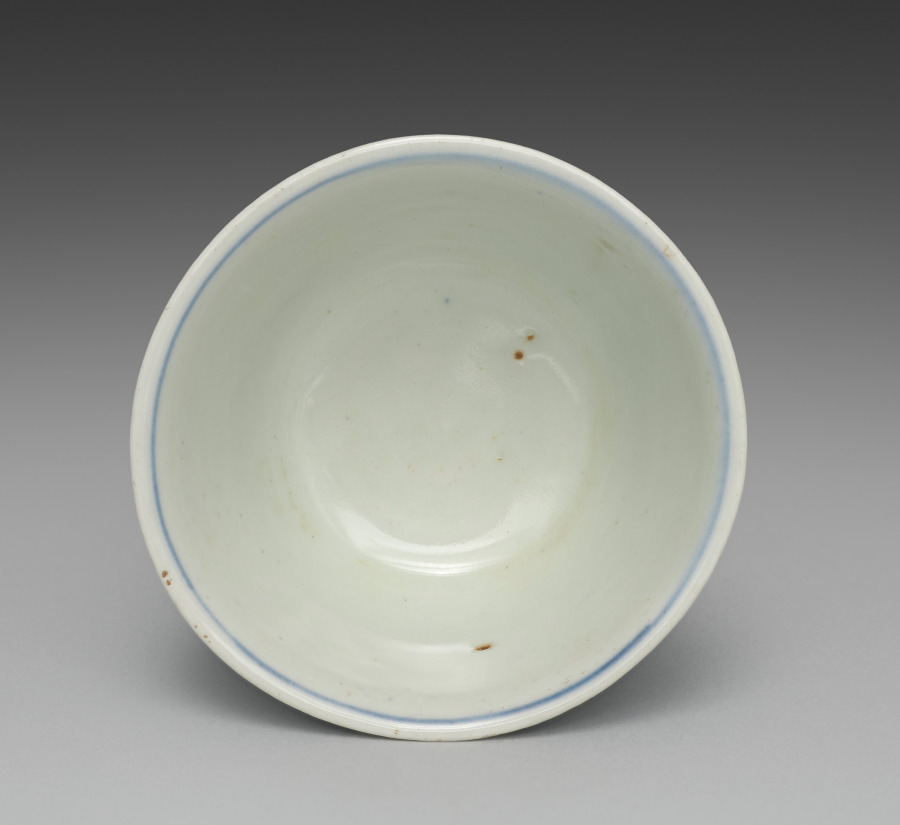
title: Cup from Tea Cups with Dragons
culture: Japan, Edo period (1615–1868)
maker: Seifū Yohei I (Japanese, 1801–1861)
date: 1840s–57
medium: One from a set of five tea cups; porcelain with underglaze blue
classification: Ceramic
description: Seifū Yohei I made both blue and white porcelains after Ming dynasty (1368–1644) Chinese wares fired in the kilns at Jingdezhen for export. He also made colorful stoneware in the style of his teacher, Nin’ami Dōhachi (Takahashi Dōhachi II) (1783–1855).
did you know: A small figure of an elephant serves as the handle for the lid.